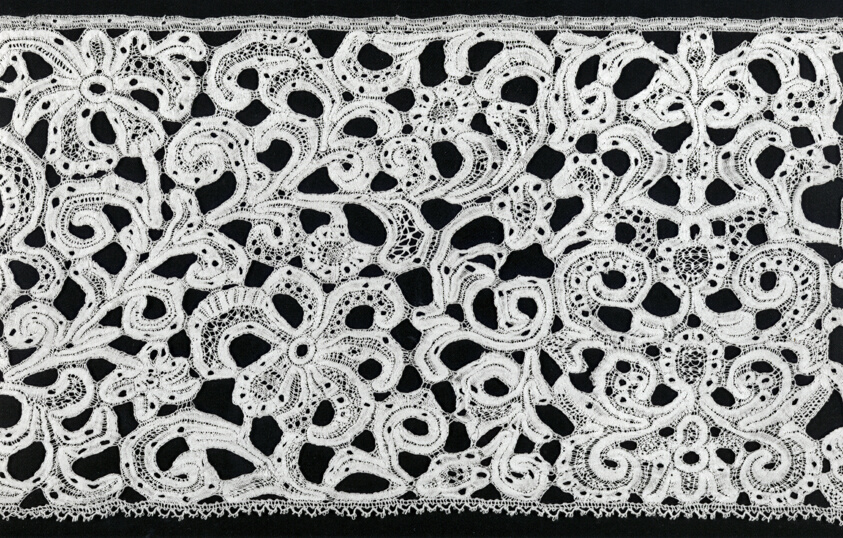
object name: Textile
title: Flounce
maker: Italy, probably Milan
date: 1701/25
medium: Linen, bobbin part lace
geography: Italy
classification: textile; lace - bobbin